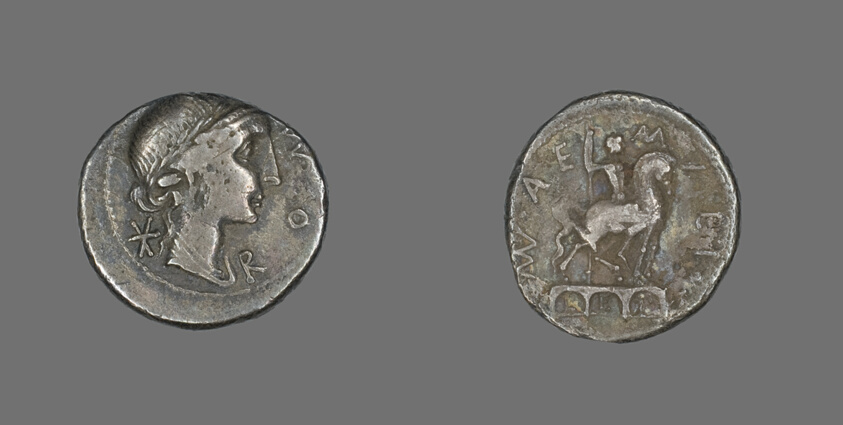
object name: Coin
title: Denarius (Coin) Depicting the Goddess Roma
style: roman (ancient, style or period), ancient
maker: Roman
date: 114-113 BCE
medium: Silver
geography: Roman Empire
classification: coin; ancient art